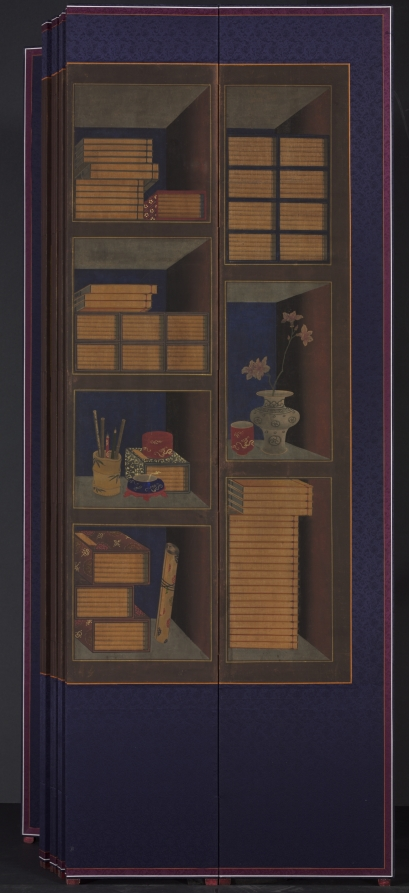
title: Books and Scholars’ Accoutrements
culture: Korea, Joseon dynasty (1392–1910)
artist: Yi Taek-gyun (Korean, 1808–after 1883)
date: late 1800s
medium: ten-panel folding screen; ink and color on silk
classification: Painting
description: First produced around the second half of the eighteenth century, chaekgado (literally, “pictures of bookshelves”) flourished throughout the 1800s as a royal emblem. And soon this pictorial genre became a popular furnishing item for aristocrats' elegant studies. The third panel from the right bears a hidden seal that reveals the artist: Yi Taek-gyun, a prominent court artist active in the late 1800s.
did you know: A convincing hypothesis that connects the Korean chaekgado tradition with the Renaissance tradition of illusionistic studiolo through the technique of trompe-l'œil and Chinese Qing period treasured cabinet paintings was first made in Park Shim-eun's thesis (2002).